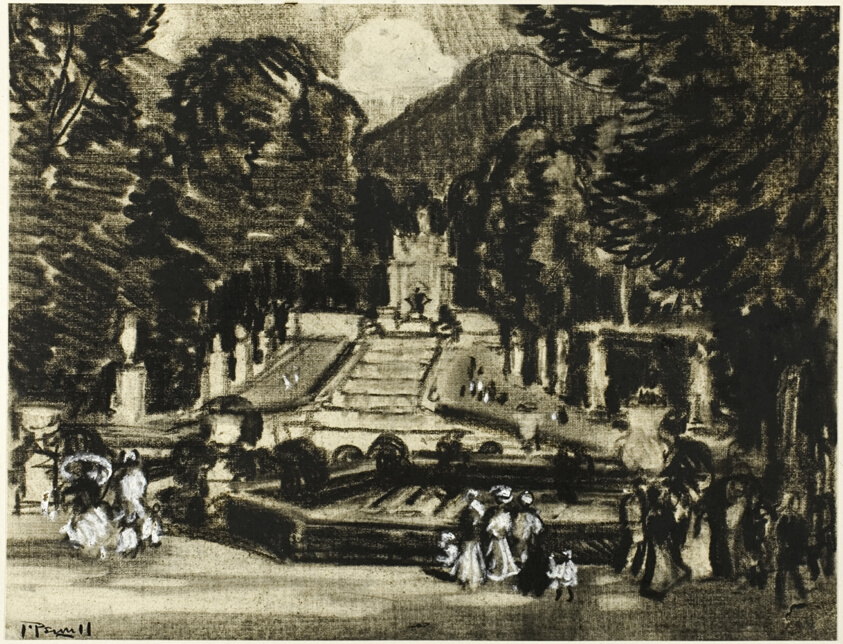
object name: Drawing and Watercolor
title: The Park, La Granga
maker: Joseph Pennell (American, 1857-1926)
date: c. 1903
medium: Oiled charcoal with stumping and erasing, heightened with touches of white gouache, on cream wove paper, perimeter mounted on off-white wood pulp laminate board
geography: United States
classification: charcoal; drawings (visual works); prints and drawing